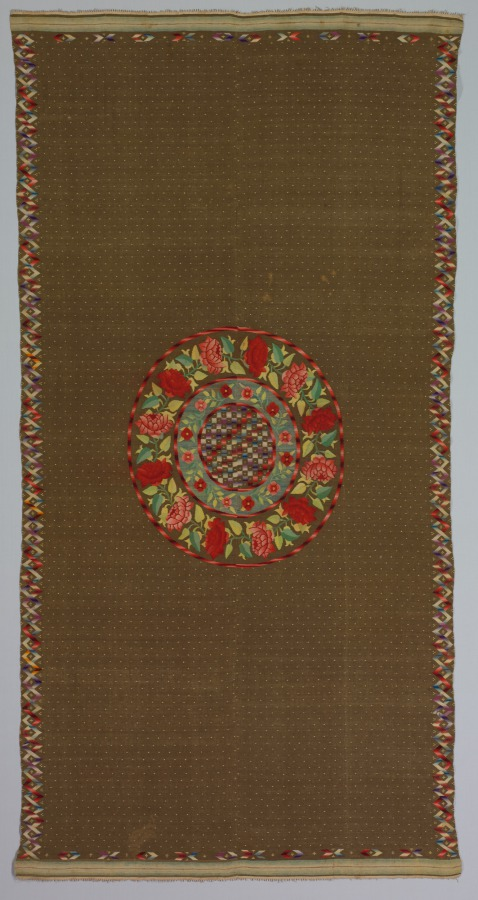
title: Sarape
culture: America, Native North American, Southwest, Mexico, Saltillo, Post-Contact, Transitional Period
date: c. 1870–1890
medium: tapestry weave: cotton and wool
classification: Textile